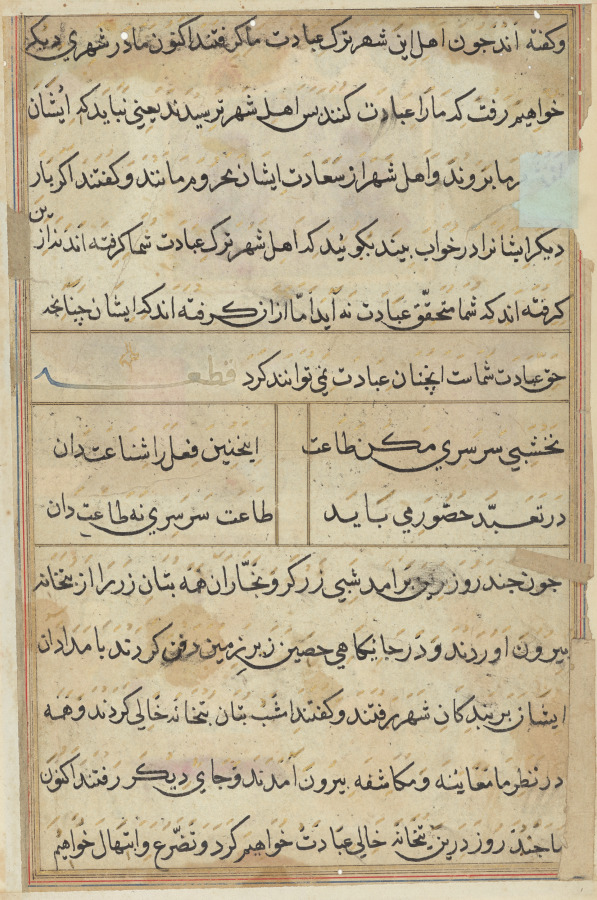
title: Page from Tales of a Parrot (Tuti-nama): text page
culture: Mughal India, court of Akbar (reigned 1556–1605)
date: c. 1560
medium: gum tempera, ink, and gold on paper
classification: Painting